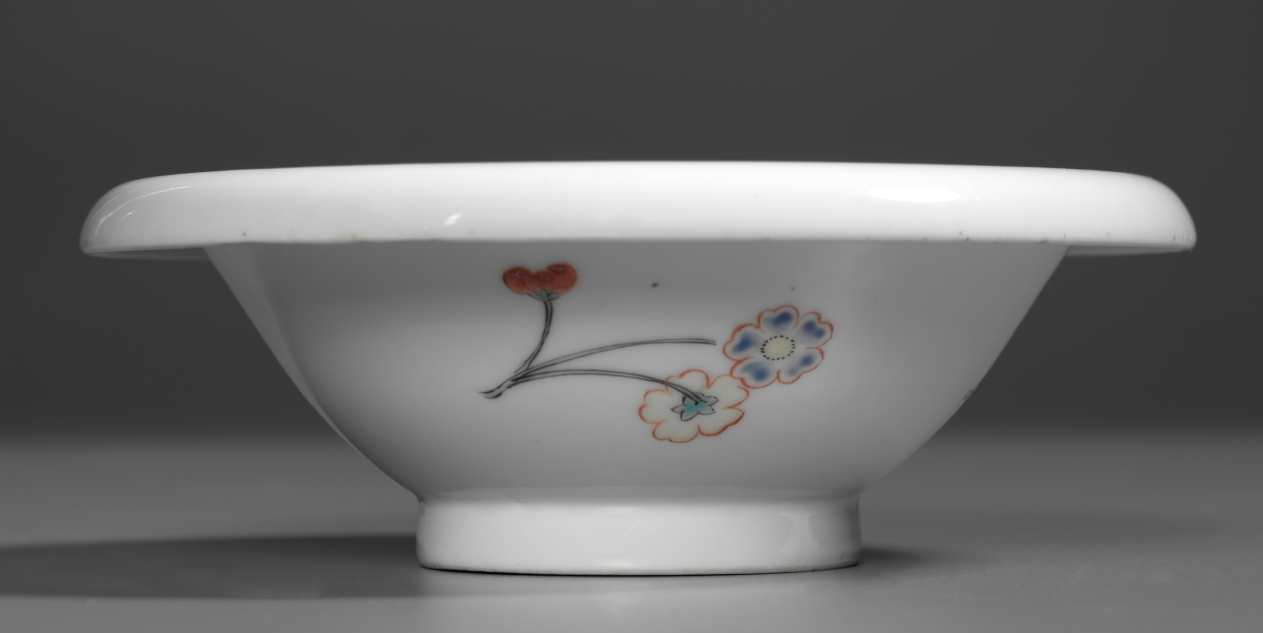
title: Bowl with Floral Spray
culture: Japan, Edo period (1615–1868)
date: early 1700s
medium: One from a set of bowls; porcelain with overglaze color enamel (Hizen ware, Kakiemon type)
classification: Ceramic